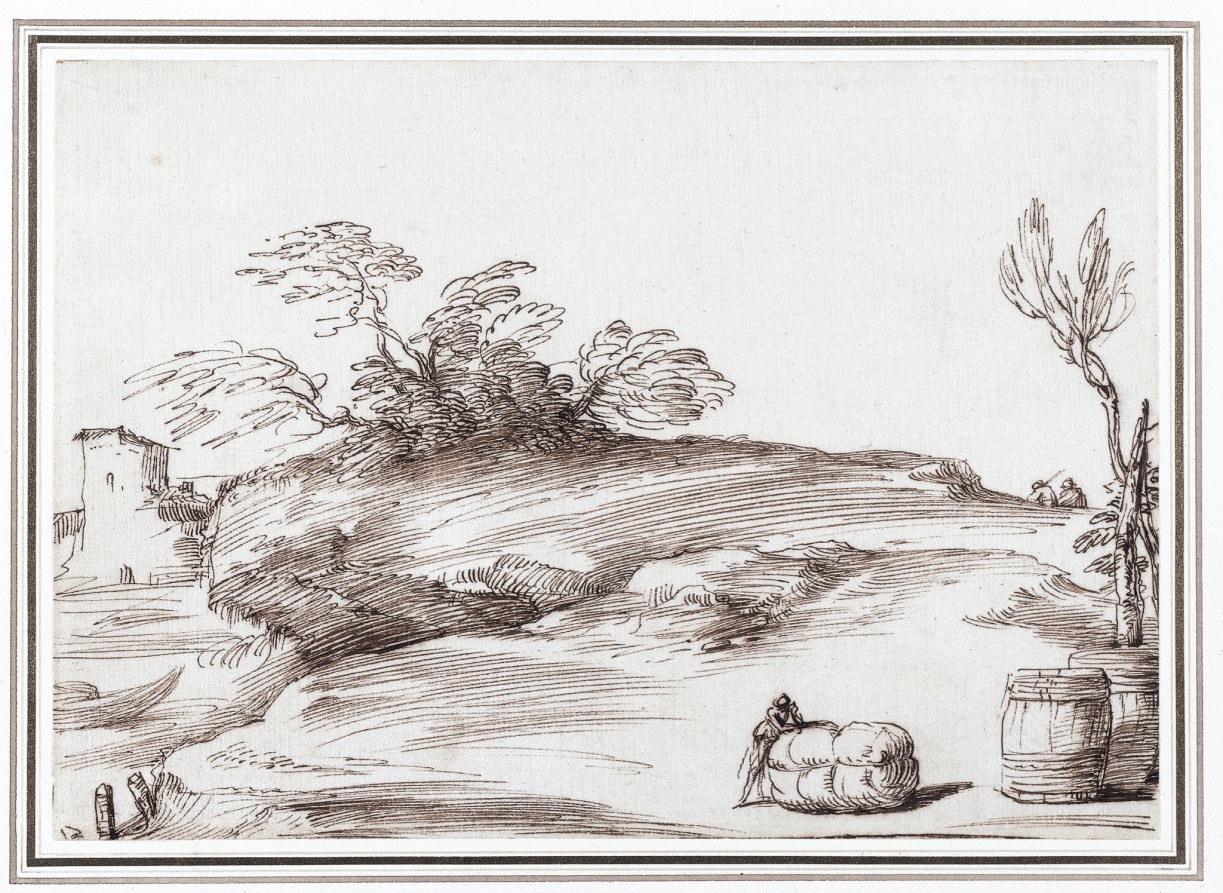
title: Landscape with a Man Leaning on a Bale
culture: Italy, 17th century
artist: Guercino (Italian, 1591–1666)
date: c. 1640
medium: pen and brown ink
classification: Drawing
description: The tradition of landscape as an independent subject in Italian art stretches back to the 1500s and was flourishing in the 1600s, when Guercino made this drawing. Guercino, however, rarely painted pure landscape, preferring to explore this genre in the more intimate medium of drawing. This sheet, with its fluid pen lines and unified composition enlivened by small figures, is a typical example of his ability to integrate picturesque motifs into an asymmetrical, balanced whole.